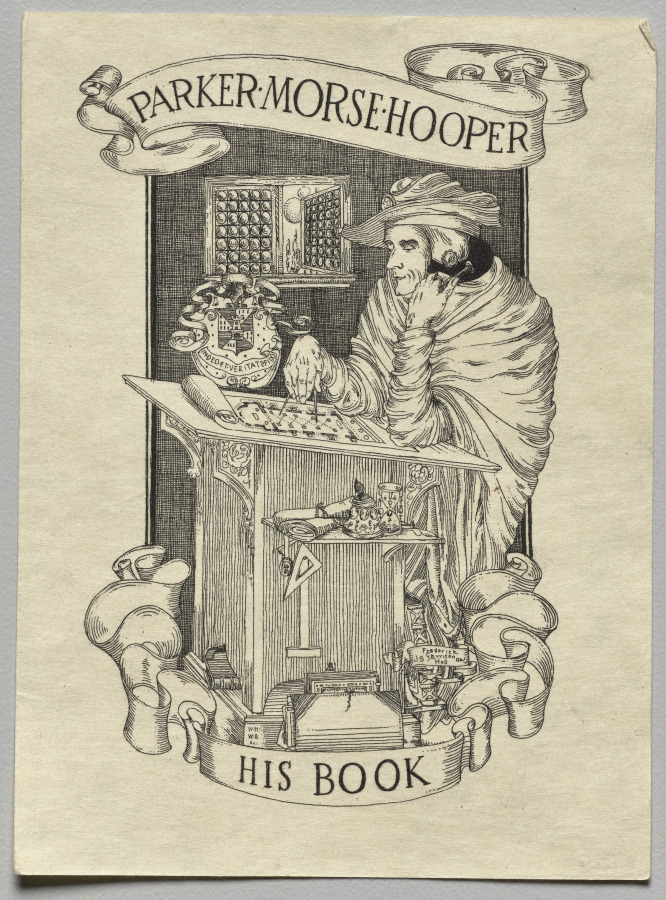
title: Bookplate: Parker Morse Hooper, His Book inscribed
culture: America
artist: Frederick Garrison Hall (American, 1879–1946)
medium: engraving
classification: Print